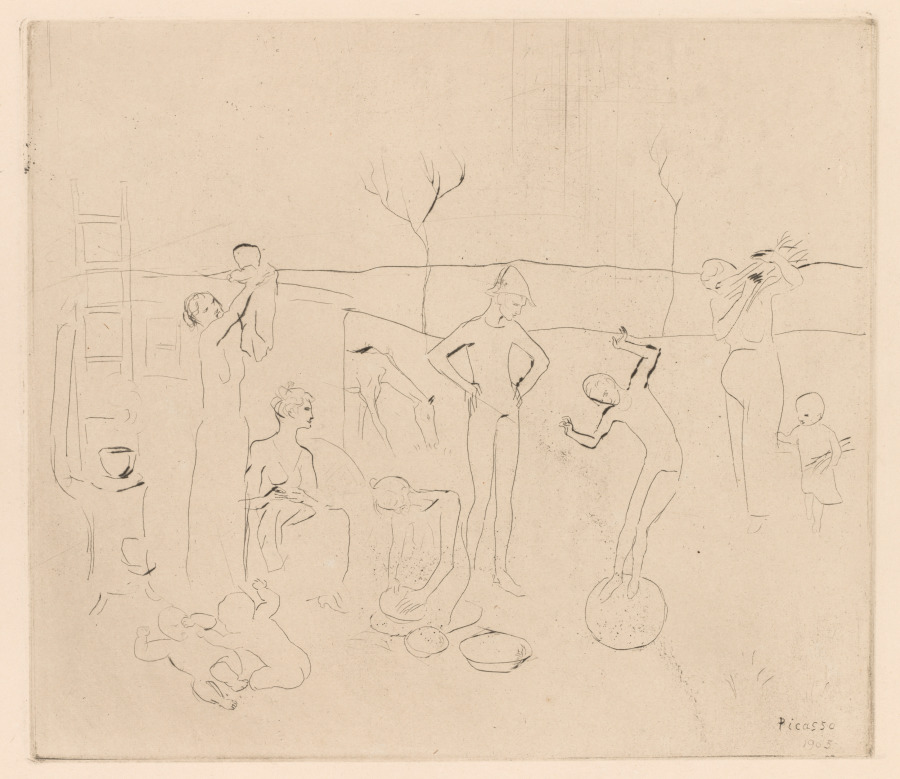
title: The Saltimbanques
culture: Spain, 20th century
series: The Saltimbanques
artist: Pablo Picasso (Spanish, 1881–1973)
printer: Louis Fort (French, active 1800s–1900s)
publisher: Ambroise Vollard (French, 1867–1939)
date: 1905, printed 1913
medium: drypoint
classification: Print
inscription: Signed, lower right, in plate: Picasso / 1905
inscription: Watermark: VAN GELDER ZONEN